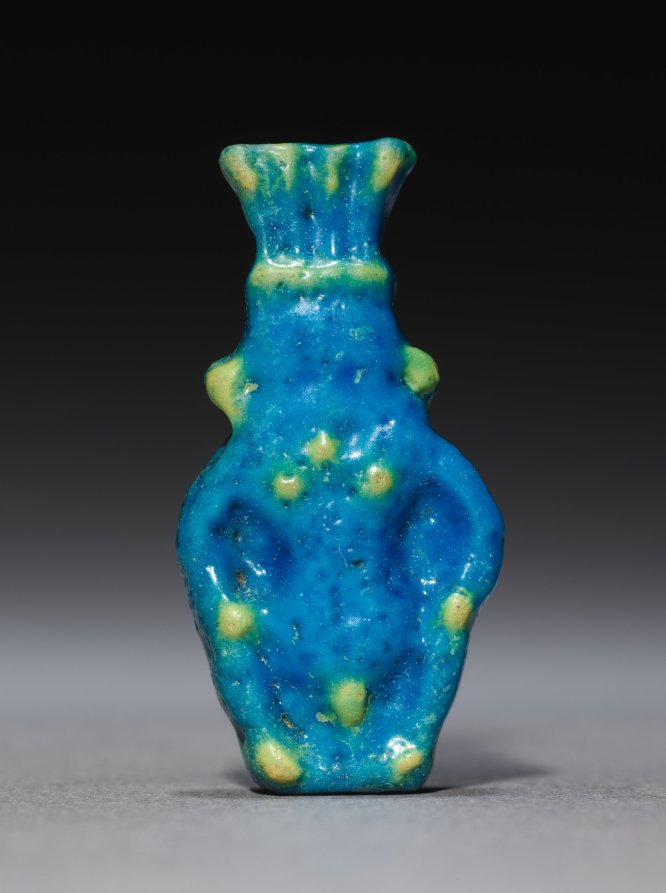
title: Amulet of Bes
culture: Egypt, Greco-Roman period (332 BCE–395 CE), Roman empire (30 BCE–395 CE)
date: 30 BCE–395 CE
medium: polychrome faience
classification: Amulets